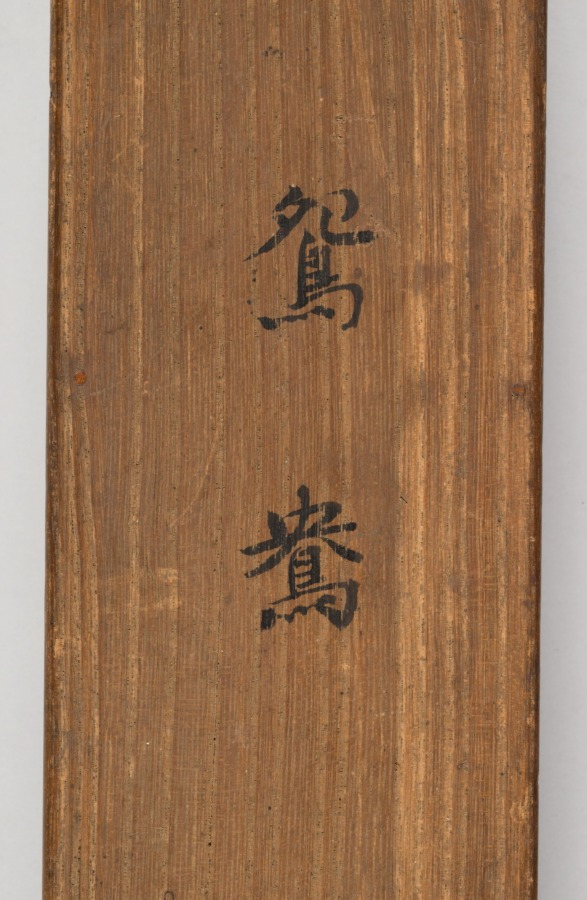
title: Mandarin Duck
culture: Japan, Muromachi period (1392–1573)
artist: Sesson Shūkei (Japanese, c. 1492–c. 1577)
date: 1500s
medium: hanging scroll; ink on paper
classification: Painting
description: In this painting, the artist depicted a scene of a solitary duck floating by reeds in a subtle arrangement of dry and wet, light and dark ink tones which conveys the tranquility of the moment.